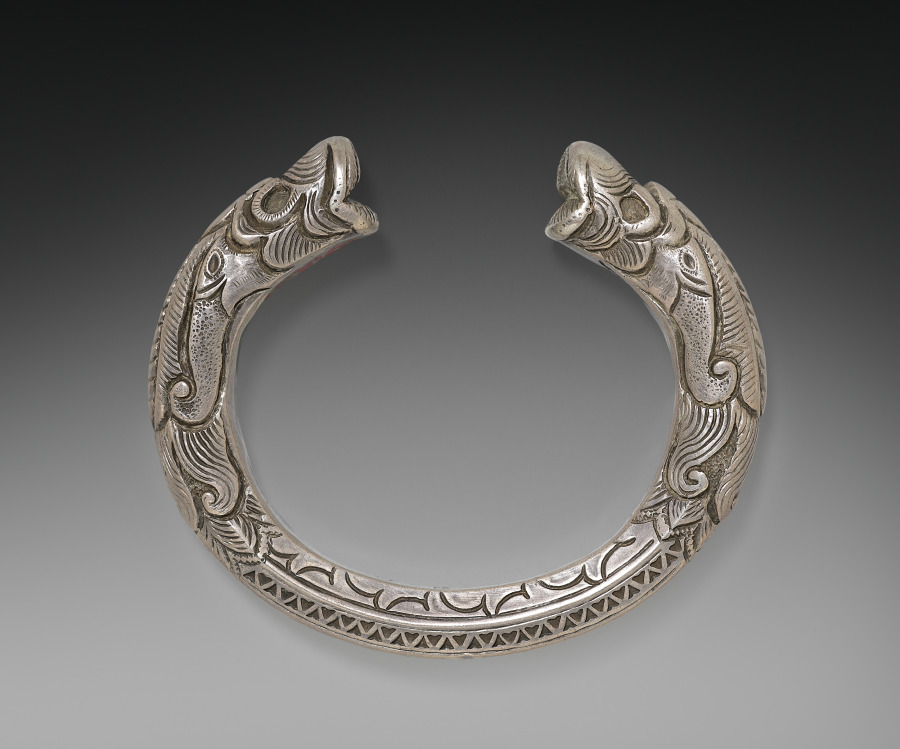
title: Bracelet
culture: India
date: 1800s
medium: silver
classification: Jewelry